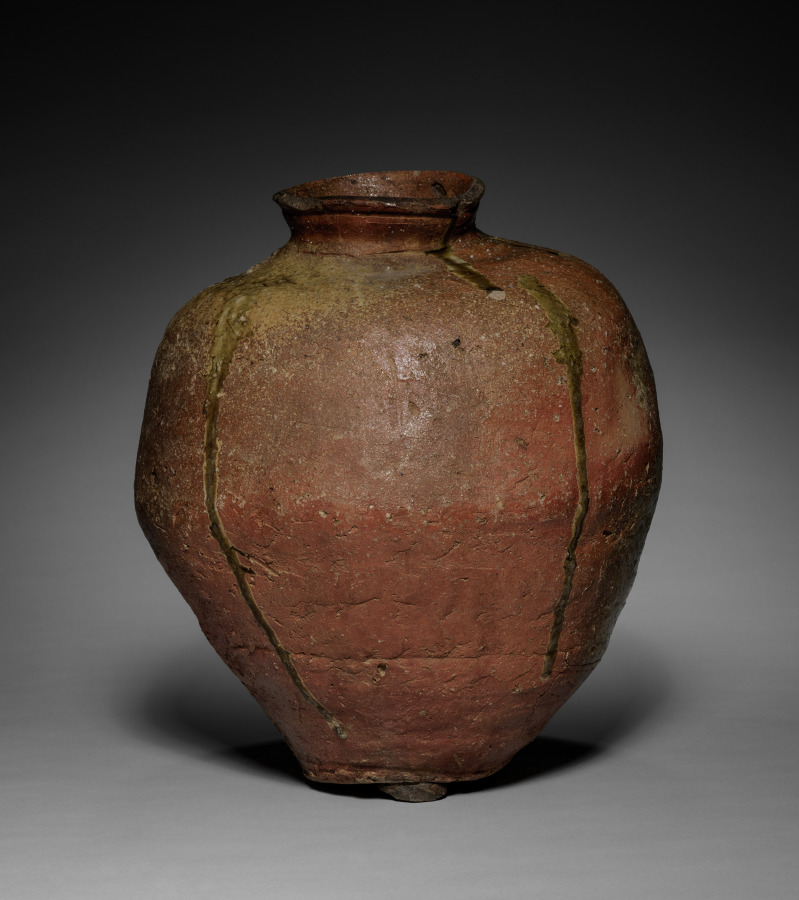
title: Large Jar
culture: Japan, Muromachi period (1392–1573)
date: 1400s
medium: stoneware with natural ash glaze (Shigaraki ware)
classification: Ceramic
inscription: Box inscription (front): 「不明」壺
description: The orange color of this jar comes from iron in the clay. Natural ash glaze settled on the vessel during firing. Originally intended for grain storage, rustic containers like this one were also prized by tea enthusiasts, who appreciated the uncalculated beauty of the glaze and the asymmetry of these humble objects. They used them to store tea leaves.